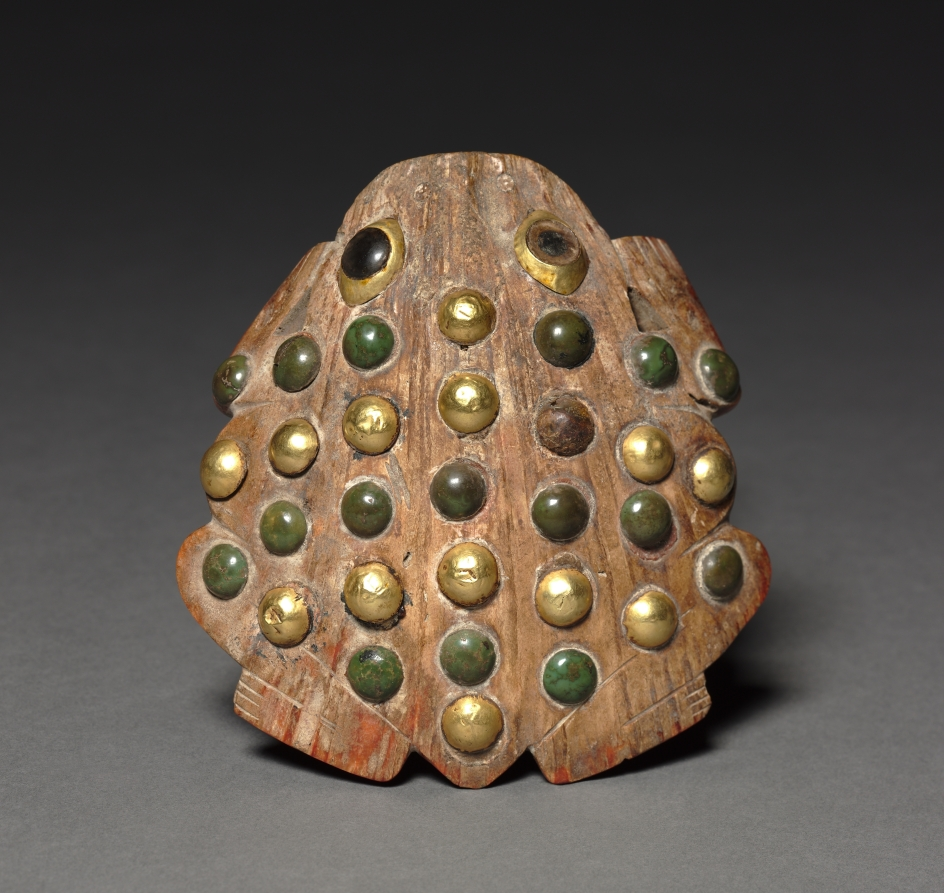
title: Frog Ornament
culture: Peru, Moche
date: 50–800 CE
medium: shell, stone, gold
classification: Jewelry